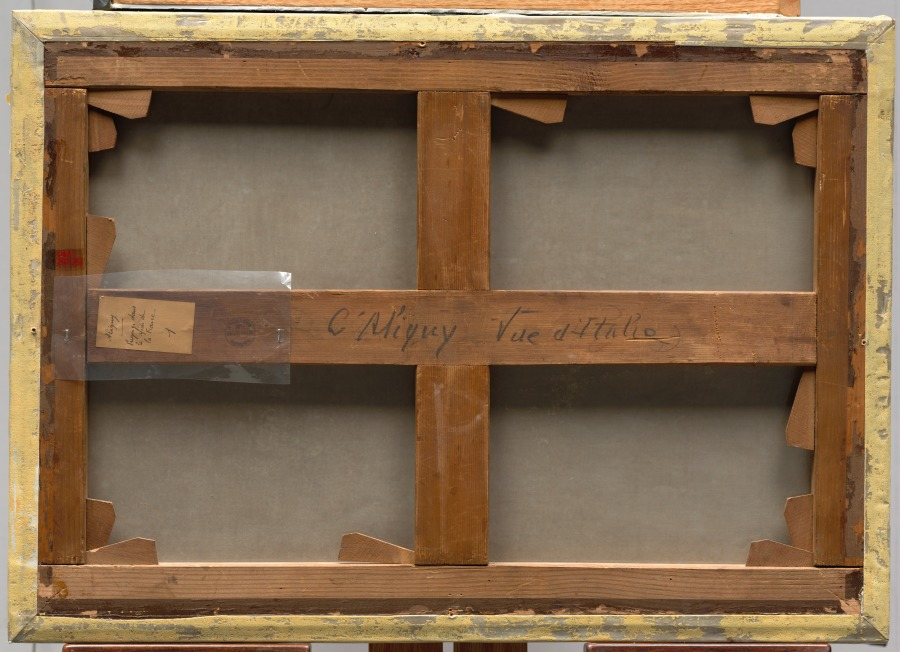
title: Châteauvieux-sur-Suran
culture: France, 19th century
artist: Antoine-Claude Ponthus-Cinier (French, 1812–1885)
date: 1848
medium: oil on paper mounted on fabric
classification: Painting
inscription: Signed lower left: [?] Aligny [false] / [mostly covered signature a little further to the right:] Ponthvs cinier Distinguishing marks on reverse: handwritten on stretcher: C'Aligny Vue d'Italie; handwritten label: Aligny / Paysage dans le Midi de la France / 1; French customs stamp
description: This view of a ruined building on a rocky cliff in Châteauvieux above the Suran river in the French Alps is constructed in the manner of a classical or ideal landscape. Forms recede at a measured pace along a sinuous, curving path that passes through carefully defined planes of fore, middle, and background. The warm, glowing light and imaginary figures pursuing their daily tasks contribute to the mood of timeless, pastoral bliss.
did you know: The son of a merchant, Ponthus-Cinier was one of the principle artists of the School of Lyon and painted neoclassical views of the countryside around Lyon and the Alpine region near the Swiss border.